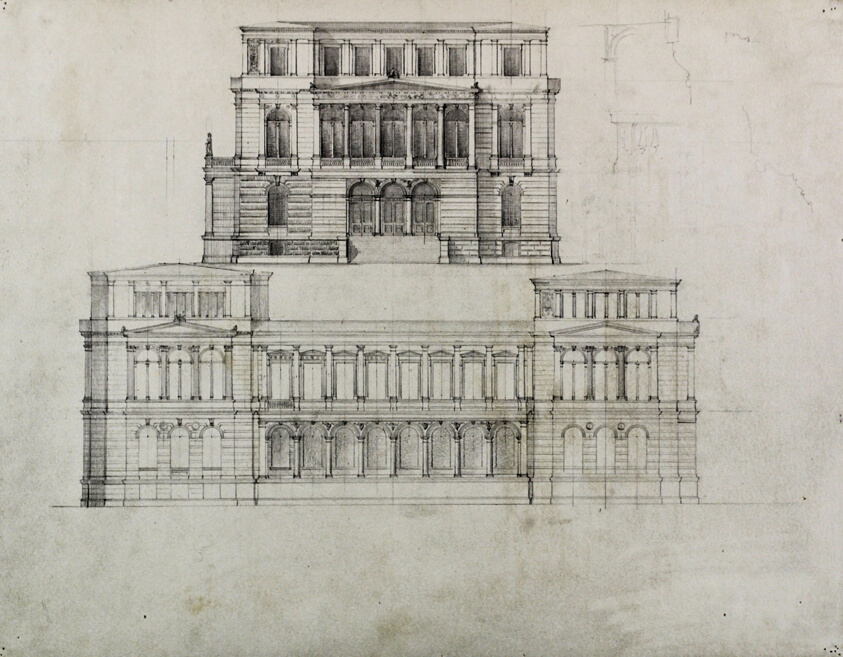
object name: Architectural Drawing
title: Design Projects, Building Elevation Study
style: 19th century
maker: Carl (Charles) J. Furst (American, born Germany c. 1840–c. 1919)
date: c. 1860–1870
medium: Graphite on drawing paper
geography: United States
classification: architectural drawing; architecture; design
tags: projects, architecture, design